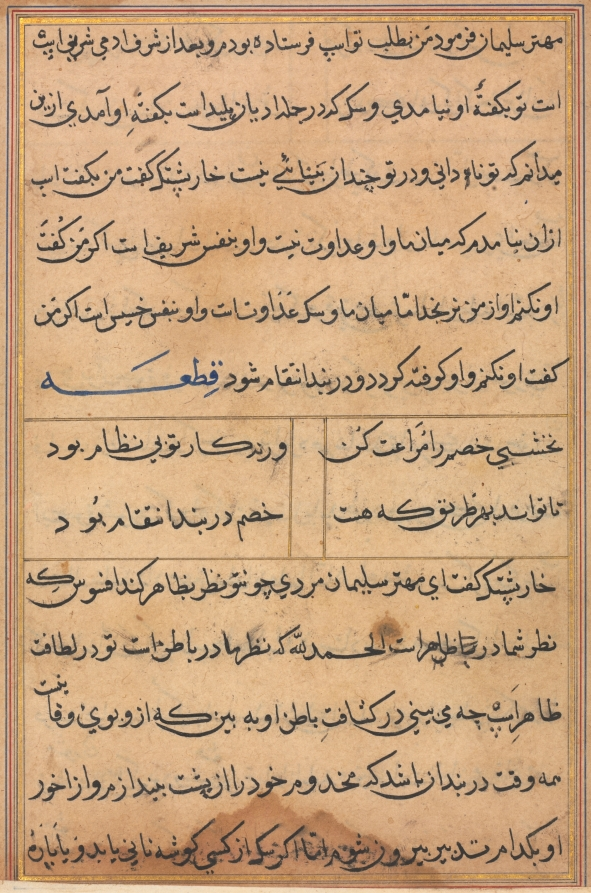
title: Page from Tales of a Parrot (Tuti-nama): text page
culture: Mughal India, court of Akbar (reigned 1556–1605)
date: c. 1560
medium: gum tempera, ink, and gold on paper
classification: Painting